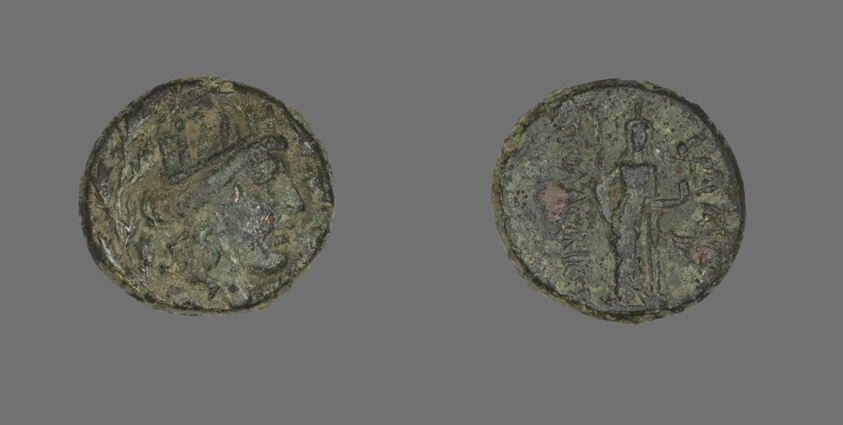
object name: Coin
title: Coin Depicting the Goddess Tyche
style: greek, ancient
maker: Greek; Smyrna, Ionia (now Izmir, Turkey)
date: 2nd-1st century BCE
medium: Bronze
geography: Smyrna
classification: coin; ancient art